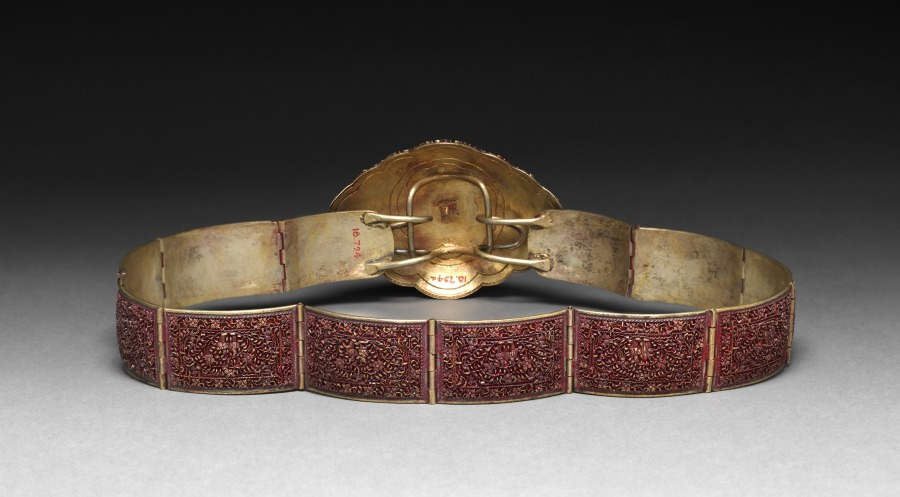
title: Belt with Buckle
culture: Siam, 19th century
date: 1800s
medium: brass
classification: Jewelry